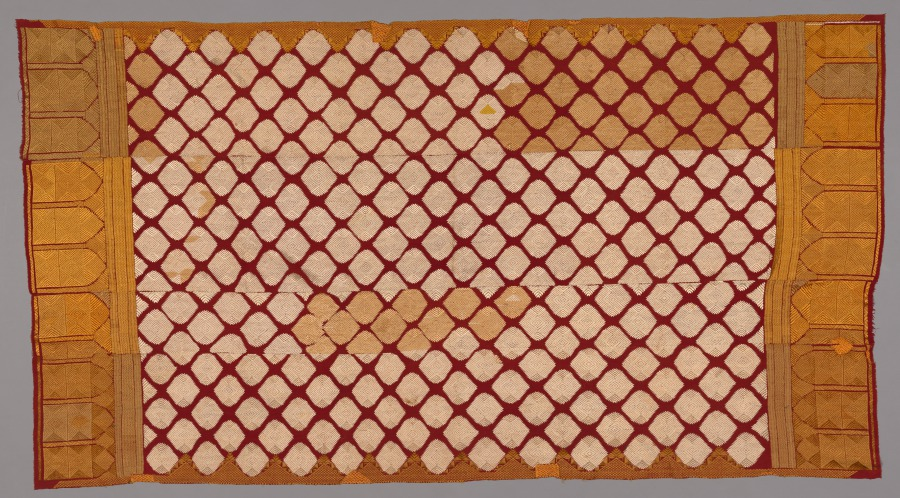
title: Head Shawl (Phulkari)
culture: India, Punjab, 19th century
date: 1800s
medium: embroidery; silk on cotton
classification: Embroidery